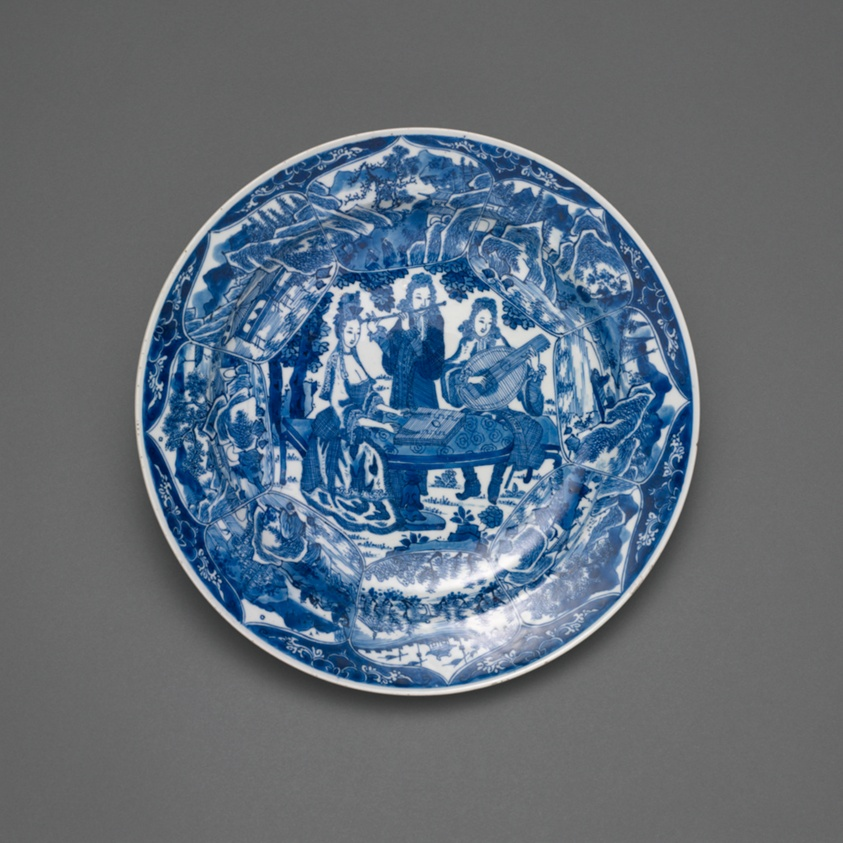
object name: Decorative Arts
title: Dish with Europeans Playing Musical Instruments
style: Chinese (culture or style)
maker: China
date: Qing dynasty (1644–1911), Kangxi period (1661–1722)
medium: Porcelain painted in underglaze blue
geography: China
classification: dish (vessel); porcelain; asian art; ceramics; decorative arts